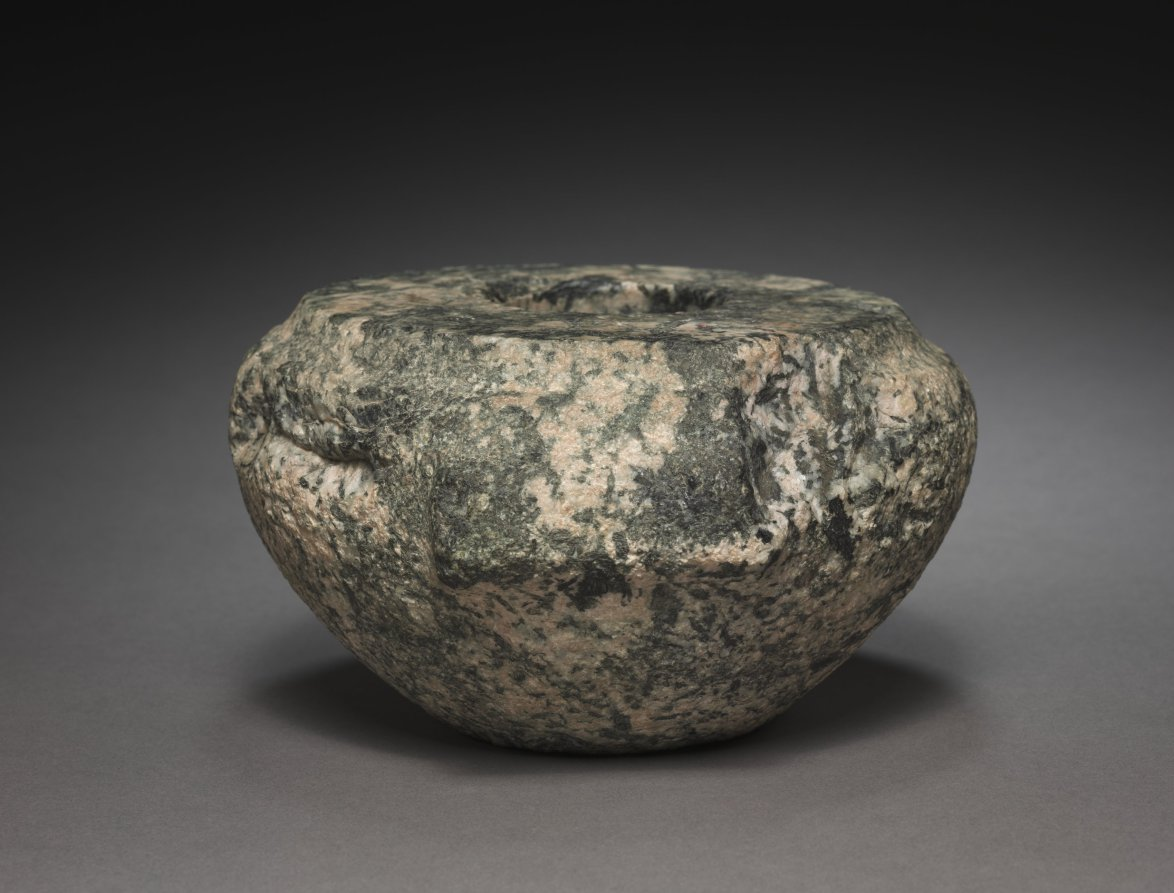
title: Squat Dummy Jar with Lug Handles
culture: Egypt, probably Saqqara, north of the Step Pyramid, tomb 2347, excavations of J. E. Quibell, 1910-1911, Early Dynastic (2950–2647 BCE), Dynasties 2–3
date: 2700–2573 BCE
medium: hornblende diorite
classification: Vessels